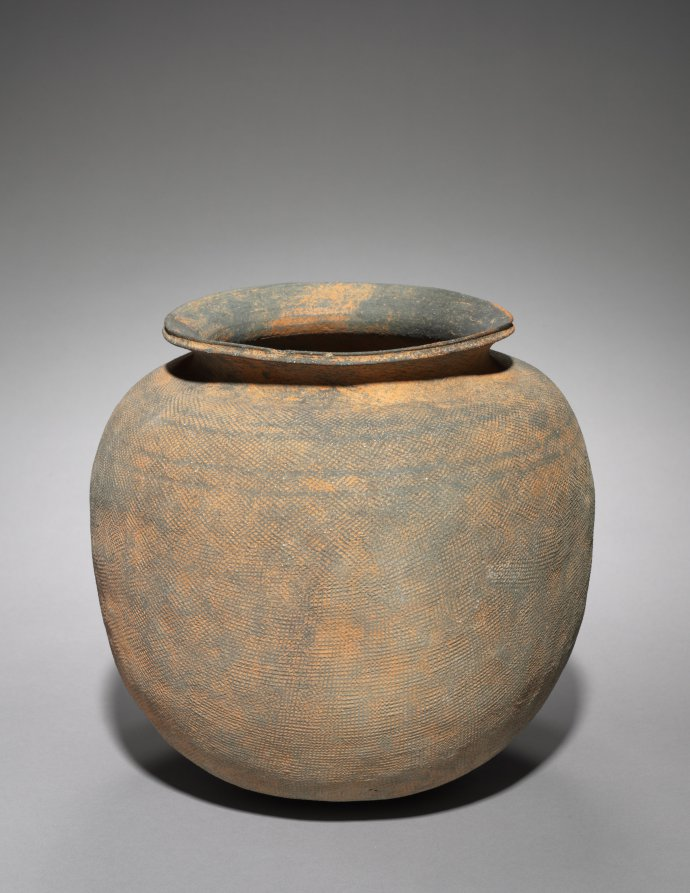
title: Jar with Loop Handle with Overall Impressed Surface Decoration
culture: Korea, Baekje kingdom (18 BCE–660 CE)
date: 200s–300s CE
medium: earthenware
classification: Ceramic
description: Closed kilns built on hillsides became widely used for producing this type of pottery vessel in Korea during the Three Kingdoms period. Both its gray color and shimmering glaze are the result of the reduction of oxygen in the closed kiln chamber. The pounding technique (tanal in Korean) on the surface strengthened the clay body, leaving behind a geometric pattern.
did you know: Closed kilns built on hillsides became widely used for producing this type of pottery vessel in Korea during the Three Kingdoms period.